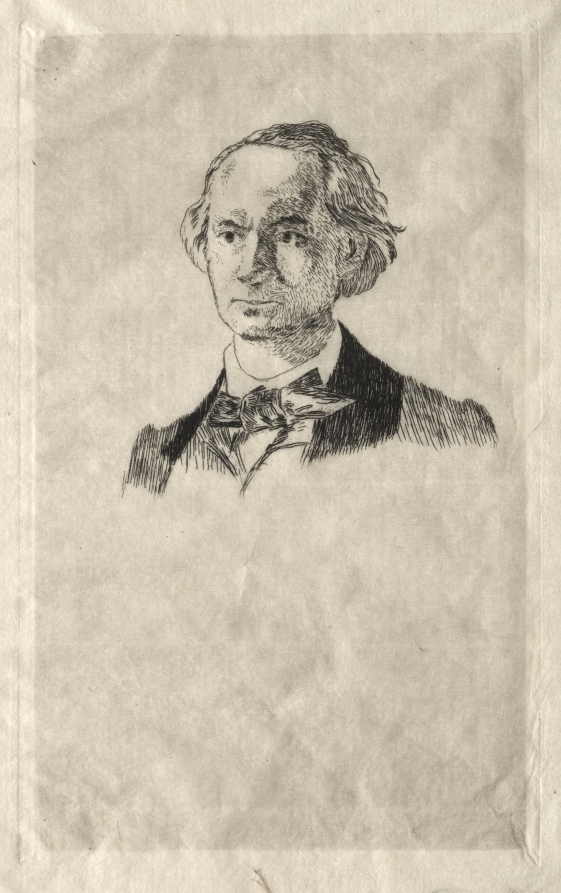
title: Charles Baudelaire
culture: France, 19th century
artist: Édouard Manet (French, 1832–1883)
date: 1865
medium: etching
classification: Print